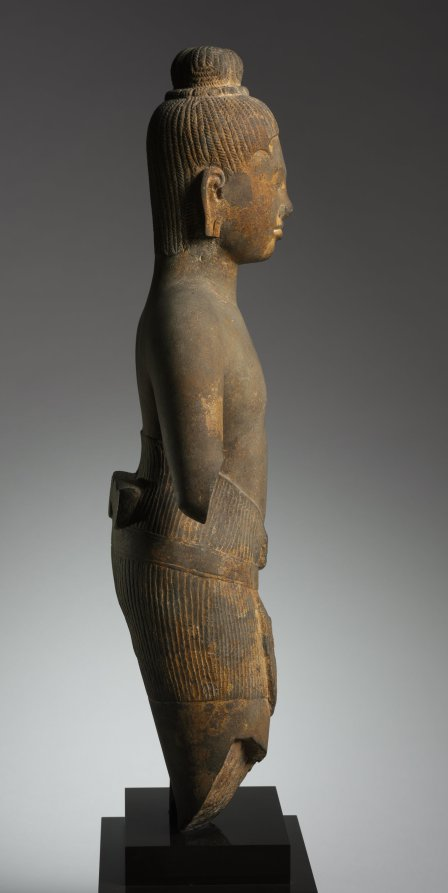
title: Shiva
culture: Cambodia, Angkor, Baphuon, early 12th century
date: early 1100s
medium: gray sandstone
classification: Sculpture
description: The parallel matted locks of hair and the incised third eye on the forehead identify this figure as the Hindu god Shiva. A close-cropped beard comes to a point at his chin. The slim elegant form and short lower garment fastened with a low-slung belt are features characteristic of this period.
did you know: Three beauty lines are lightly incised around the neck.